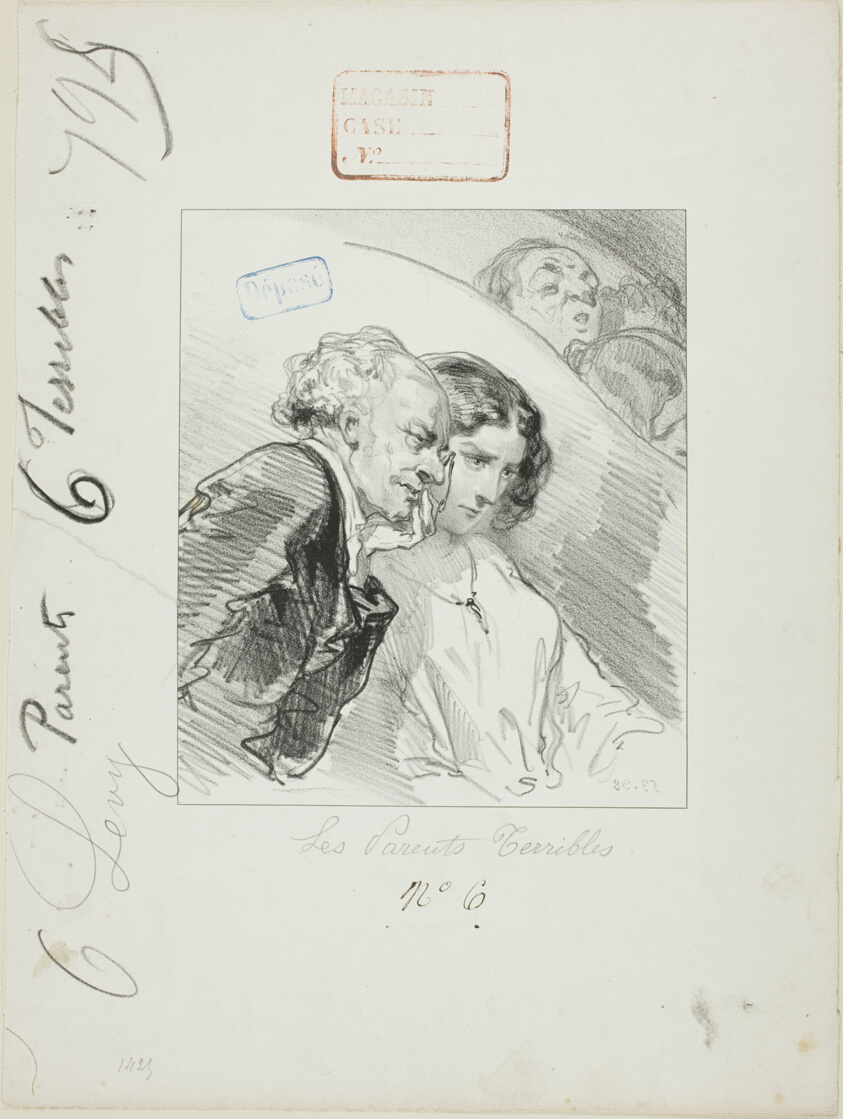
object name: Print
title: Les-Parents-Terribles series: Yes, but you will see the captain...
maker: Paul Gavarni (French, 1804-1866)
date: 1853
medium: Lithograph in black on ivory wove paper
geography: France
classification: lithograph; print; prints and drawing